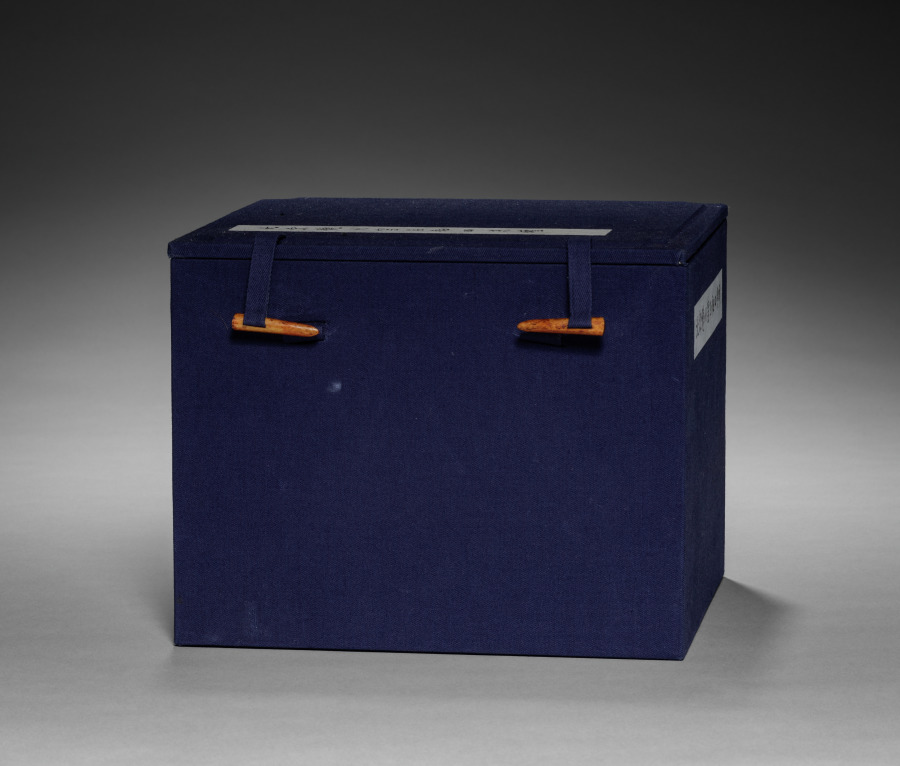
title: Globular Jar with Four Loops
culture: China, Southern Song dynasty (1127-1279)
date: 960–1279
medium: Porcelaneous ware of the qingbai type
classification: Ceramic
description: In the 900s, potters in southeast China excelled in producing white ceramics, including bluish-white (qingbai; 青白) glazed ware. The Keithleys’ jar was made when the qingbai ware–producing kilns were most active and manufactured their finest ware. The jar is missing its cover, which would have been flat with a loop in the center so that it could be tied in place with a string or silk cloth.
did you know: This container was probably used to store tea or grain.